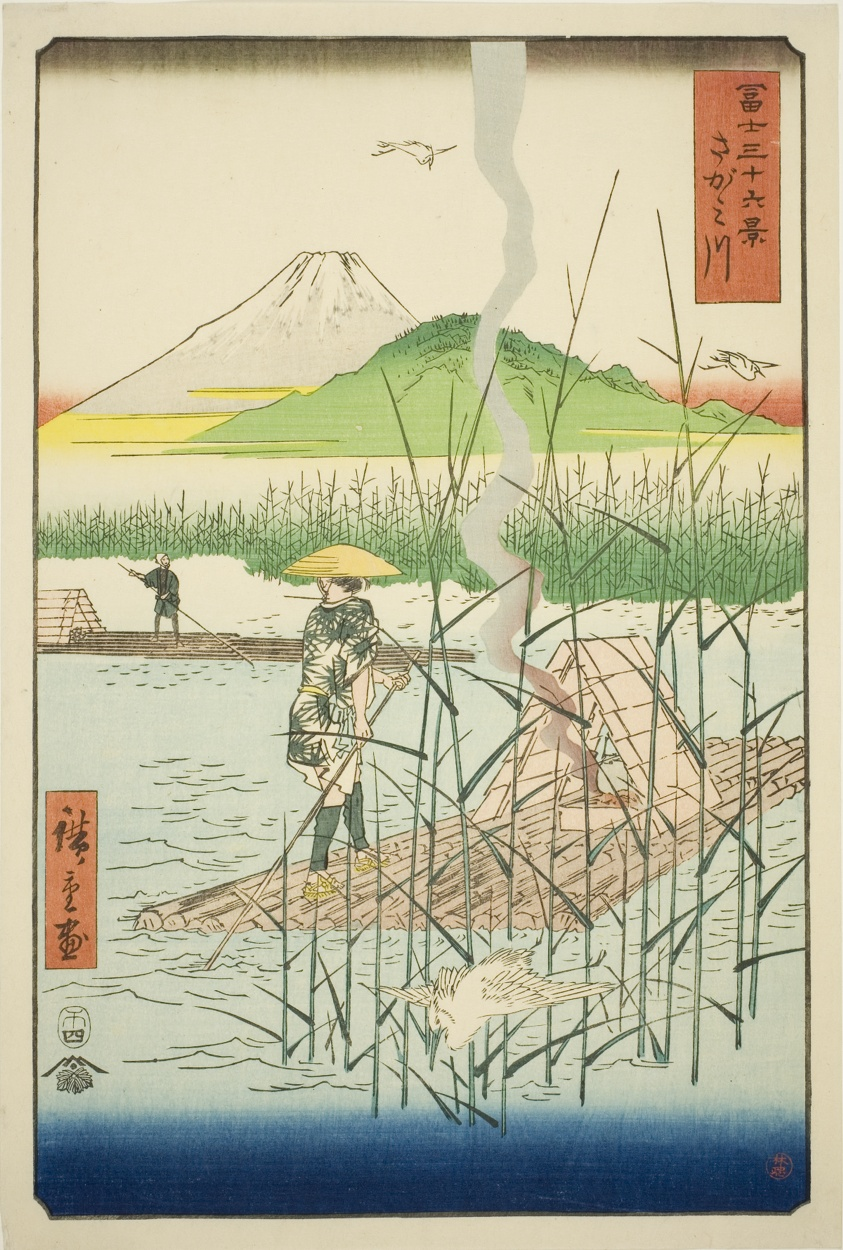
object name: Print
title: Sagami River (Sagamigawa), from the series "Thirty-six Views of Mount Fuji (Fuji sanjurokkei)"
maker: Utagawa Hiroshige 歌川 広重; Japanese, 1797-1858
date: 1858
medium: Color woodblock print; oban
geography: Japan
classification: woodblock print; print; asian art